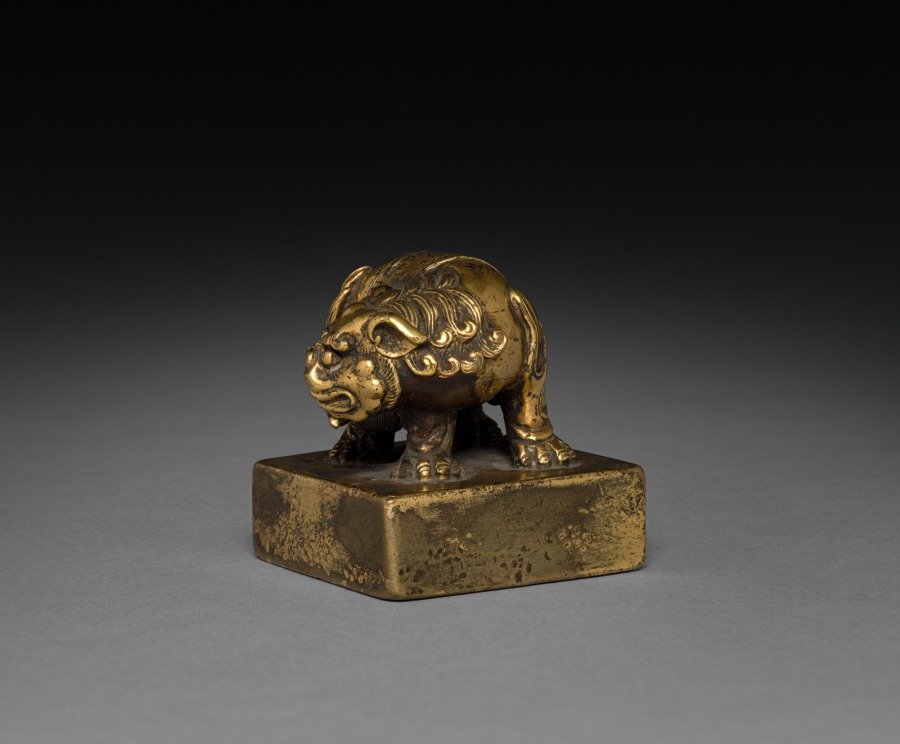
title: Seal, Lion-Dog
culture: China, Song dynasty (960-1279)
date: 960– 1279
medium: gilt bronze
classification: Metalwork